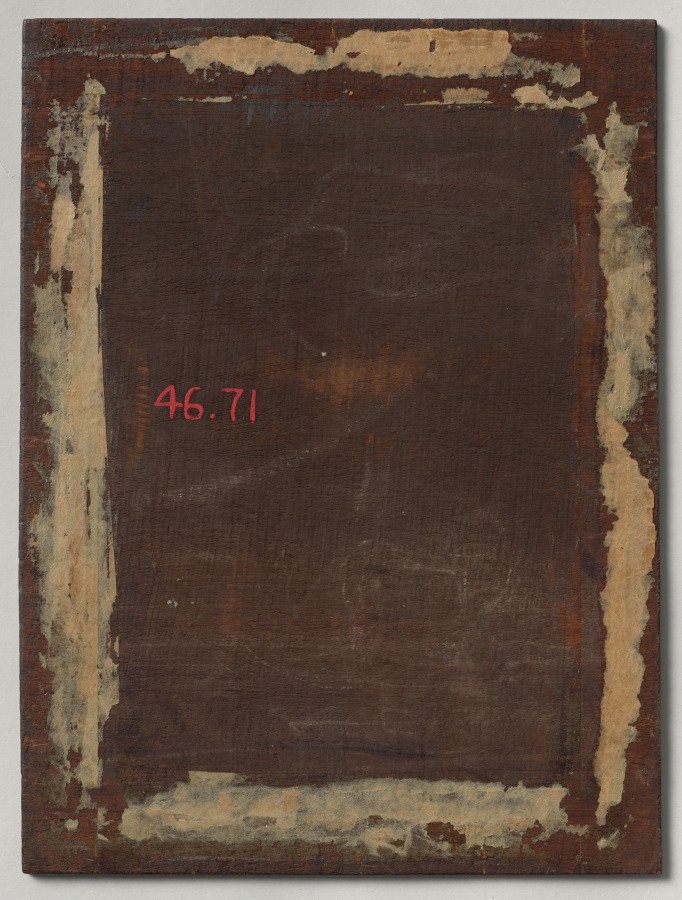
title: The Beach at Deauville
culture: France, 19th century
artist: Eugène Boudin (French, 1824–1898)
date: 1864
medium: oil on wood panel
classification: Painting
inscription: Signed in brown paint lower right corner: E. Boudin 1864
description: During the 1860s, Boudin executed many paintings and watercolors representing well-to-do tourists and vacationers enjoying seaside resorts in Normandy, principally Trouville and Deauville. In this scene, the informally posed figures suggest a sense of relaxation and intimacy. The overturned chair in the foreground underscores the impression of a casually observed moment, as though a sea breeze or a quick departure by its former occupant has upended it. The majority of Boudin's small oil paintings of beach scenes of the 1860s were executed on wood panel. After laying down a thin white ground, Boudin seems to have begun painting directly, not drawing or laying in guidelines for the forms. The result is a freshness and airiness appropriate to a windy day at the beach.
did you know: Boudin evokes the feeling of wind by painting the fluttering blue dress, the beach walker leaning to the left, the whitecaps on the water, and the angle of the sails on the boat in the distance.